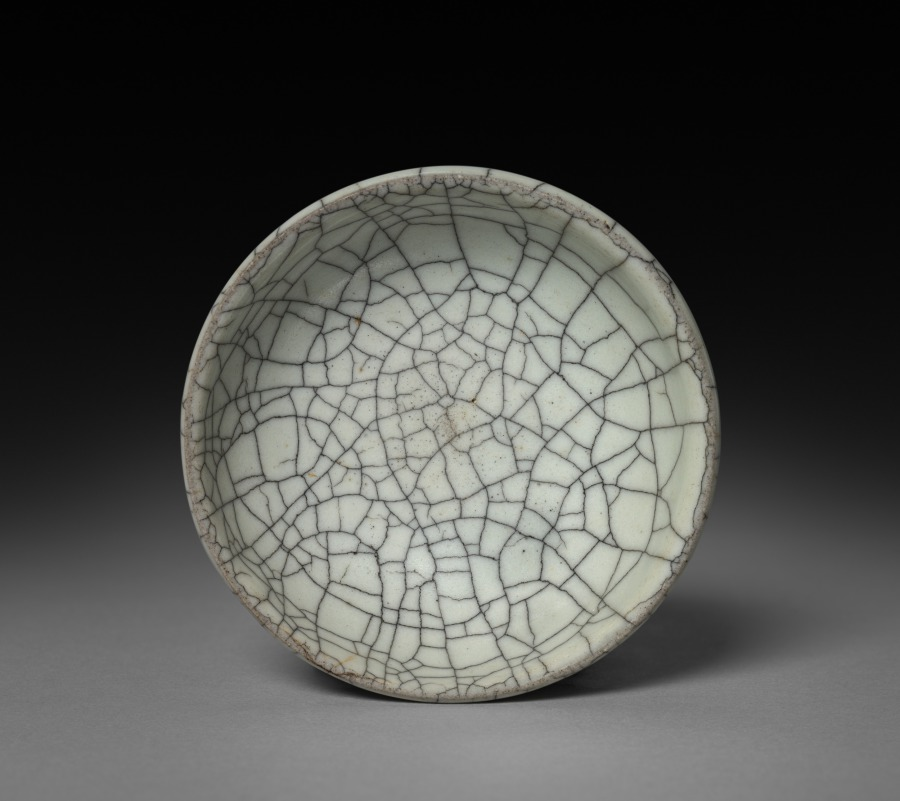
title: Wine Cup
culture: China, Song dynasty (960-1279)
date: 960–1279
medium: Glazed dark brown stoneware, Guan ware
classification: Ceramic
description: Wine was often served hot in porcelain cups that could also be used in popular drinking games.